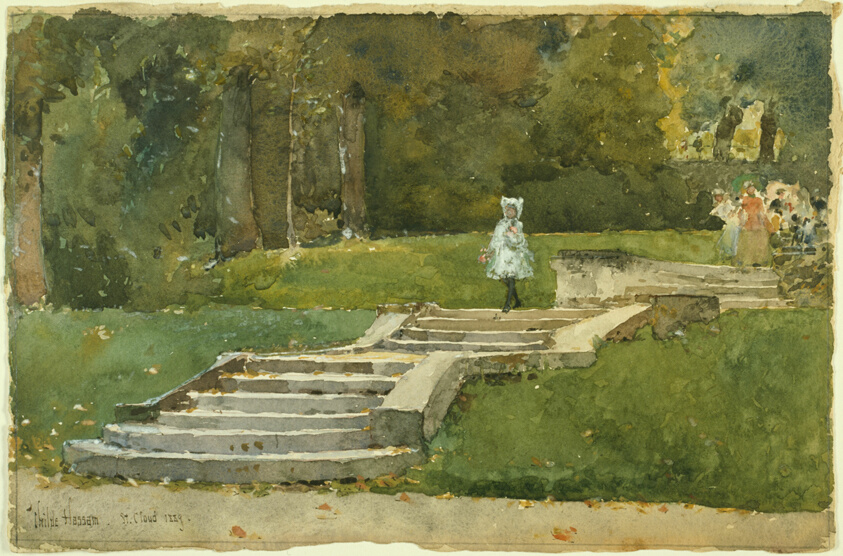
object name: Drawing and Watercolor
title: Saint-Cloud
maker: Childe Hassam (American, 1859-1935)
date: 1889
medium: Watercolor on paper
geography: United States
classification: watercolor; drawings (visual works); prints and drawing